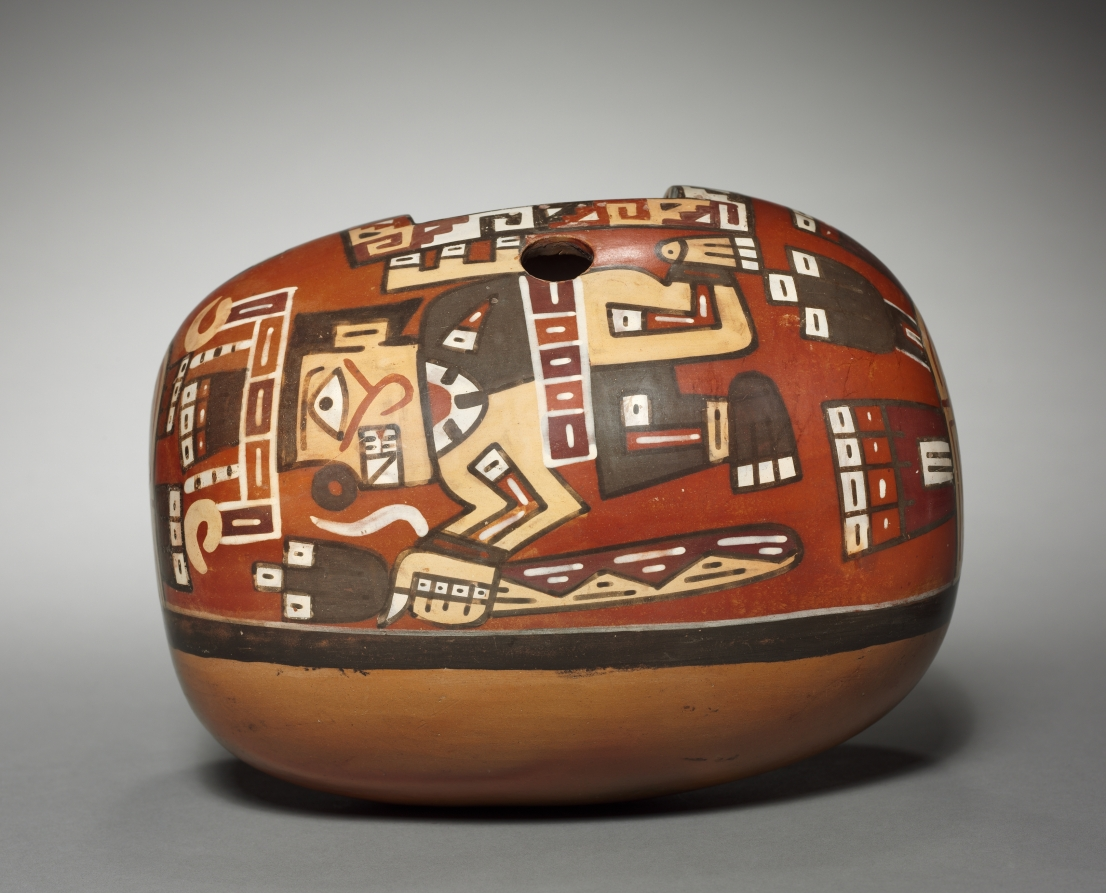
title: Container with Deity Head and Winged Attendants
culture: Central Andes, central coast, coastal Wari style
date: 600–1000 (Thermoluminescence date, 730–1190)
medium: ceramic and slip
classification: Ceramic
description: The head of the staff deity, the most important supernatural being depicted in Wari art, appears on the ends of this container, the function of which is mysterious. The sides feature two of the deity's attendants, each with a wing and N-shaped fangs drawn from the animal world. One of these creatures carries a staff, a supreme symbol of divine authority and power.